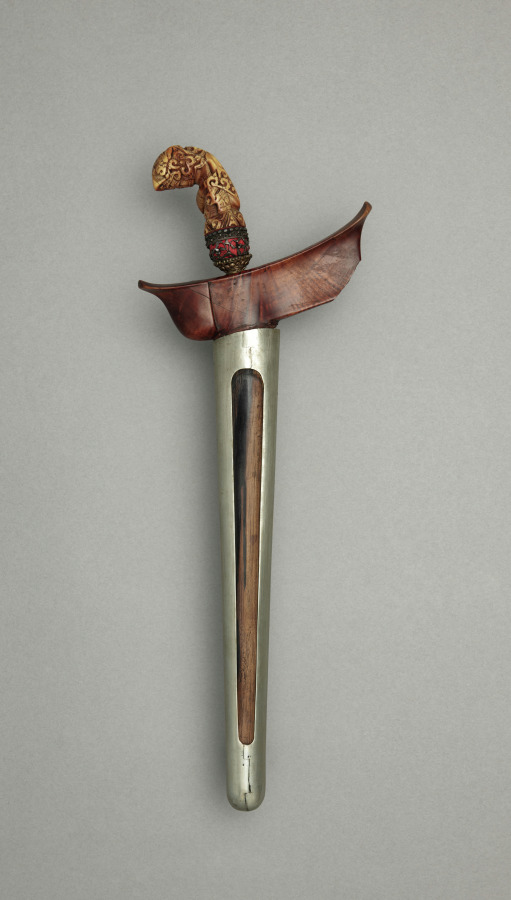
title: Dagger and Scabbard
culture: Philippines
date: before 1916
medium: Blade: metal; handle: ivory with silver mounting; scabbard: wood and silver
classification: Arms and Armor